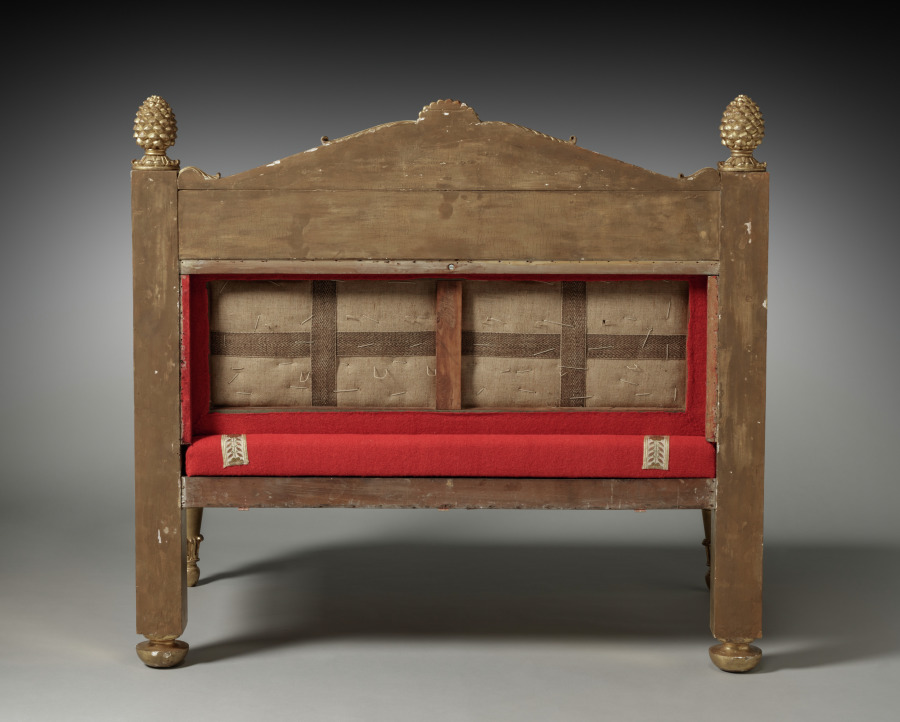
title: Settee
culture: England, 19th century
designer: Thomas Hope (British, 1769–1831)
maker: Unknown Maker (British)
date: c. 1802–07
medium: gilt-wood, reproduction wool upholstery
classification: Wood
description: An art collector, designer, and champion of neoclassicism, Thomas Hope designed this settee for display in his London house. Hope’s design exemplifies the continued interest in neoclassical ornament around 1800 through the use of elaborately carved friezes, a central pediment, and a lavishly gilded surface. In 1807 Hope published Household Furniture and Interior Decoration, featuring descriptions of his renowned collection of antiquities and the interior furnishings from his London house, including this settee. Many architects and cabinetmaking firms took inspiration from Hope’s designs, adapting Greek and Roman forms to create bold expressions of neoclassicism in their architecture and decoration.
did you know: The acorn finials, ram’s heads, and clusters of stylized honeysuckle flowers along the settee’s frame are typical of Thomas Hope’s neoclassical designs.